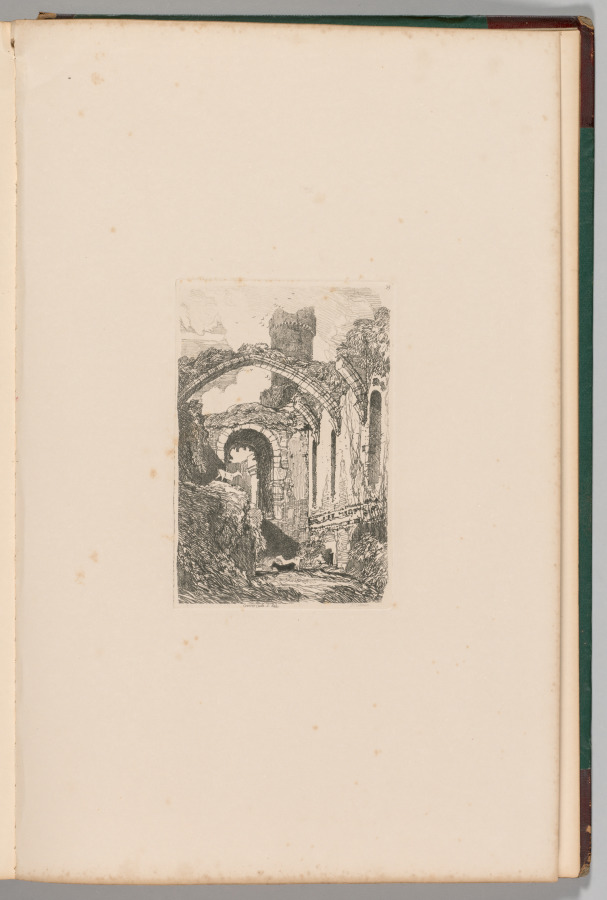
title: Liber Studiorum: Plate 33, Conway Castle, N. Wales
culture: England, 19th century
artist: John Sell Cotman (British, 1782–1842)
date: 1838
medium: softground etching, from a bound volume containing 48 plates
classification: Bound Volume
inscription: In plate, within image, upper right: 33; in plate, below image: Conway Castle. N. Wales. JS Cotman